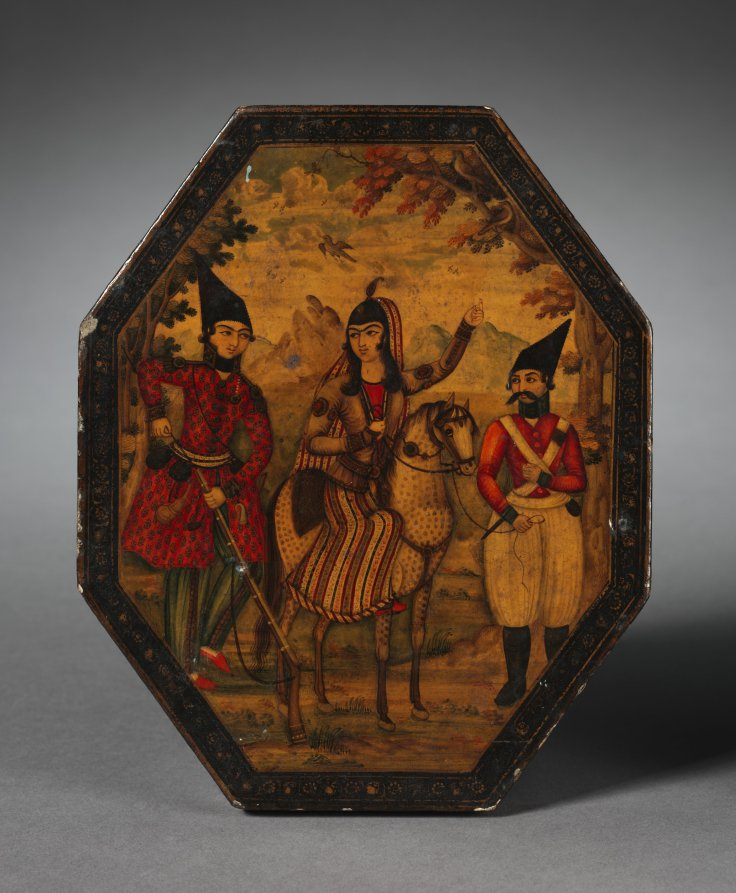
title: Octagonal Mirror Case with Lid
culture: Iran, probably Isfahan, Qajar period (1779–1925)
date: 1800s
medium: Varnished lacquer and opaque watercolor over papier-mâché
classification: Lacquer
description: This mirror case focuses on a single female figure shown on both the interior and exterior of the case. Although she wears a slightly different ensemble in the painting inside the lid, the woman has the same henna tattoo on her throat. On the exterior she is mounted on horseback and wears a jacket embroidered with gems and pearls over a pair of wide-legged trousers, typical for ladies of the Qajar court. Her bold continuous eyebrow, kohl-lined eyes, and henna-dyed fingernails accord with Qajar fashion.